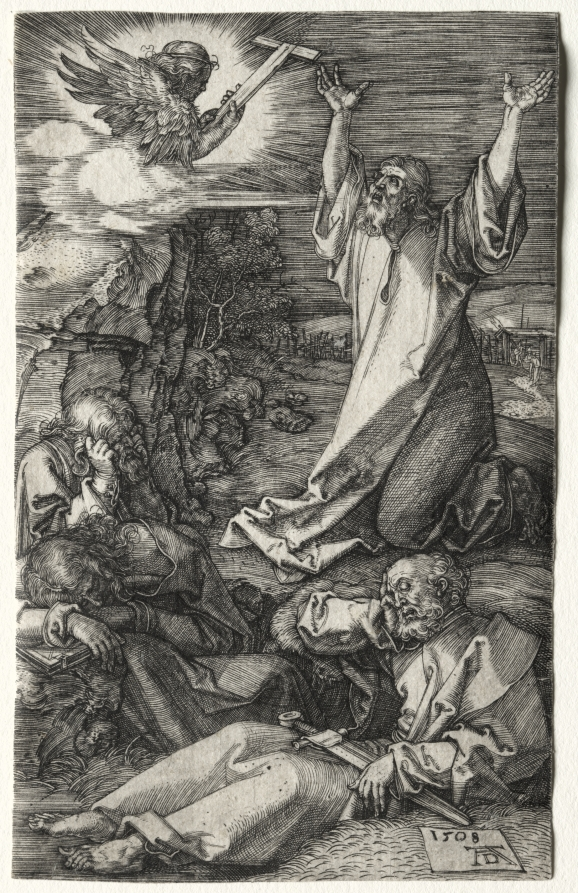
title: Christ on the Mount of Olives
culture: Germany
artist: Albrecht Dürer (German, 1471–1528)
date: 1508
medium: engraving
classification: Print